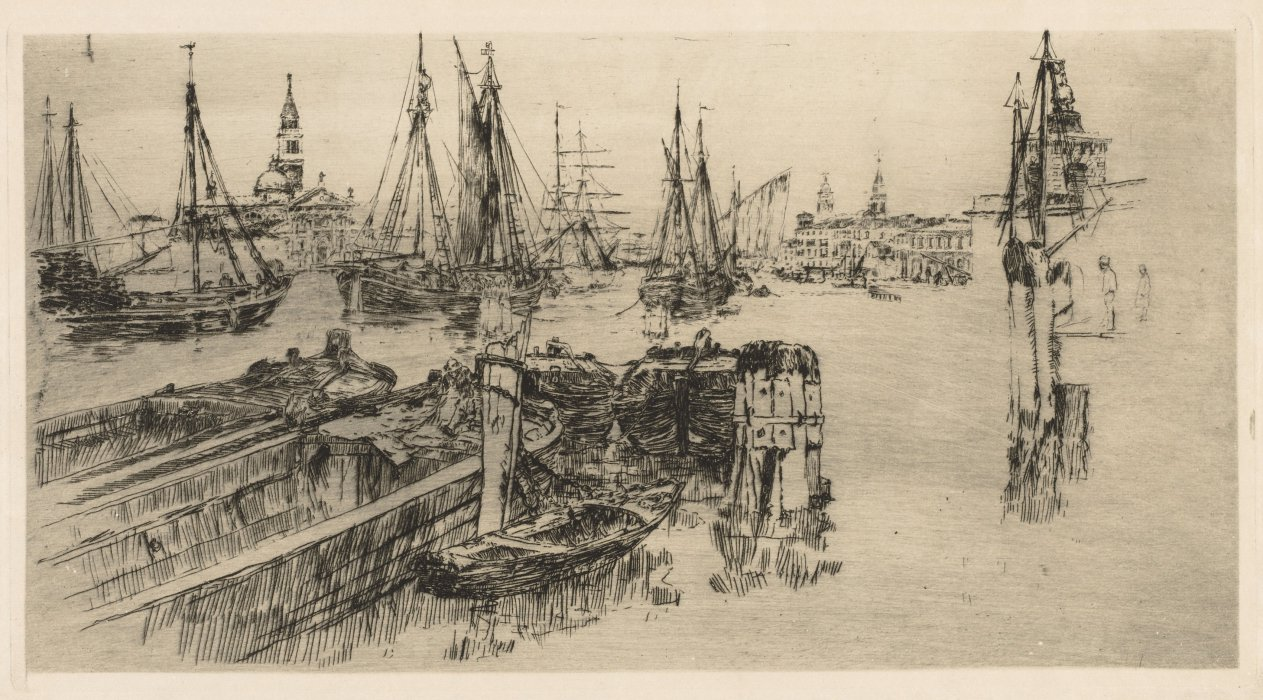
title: Shipping - On the Guidecca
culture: America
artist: Frank Duveneck (American, 1848–1919)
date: 1883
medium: etching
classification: Print